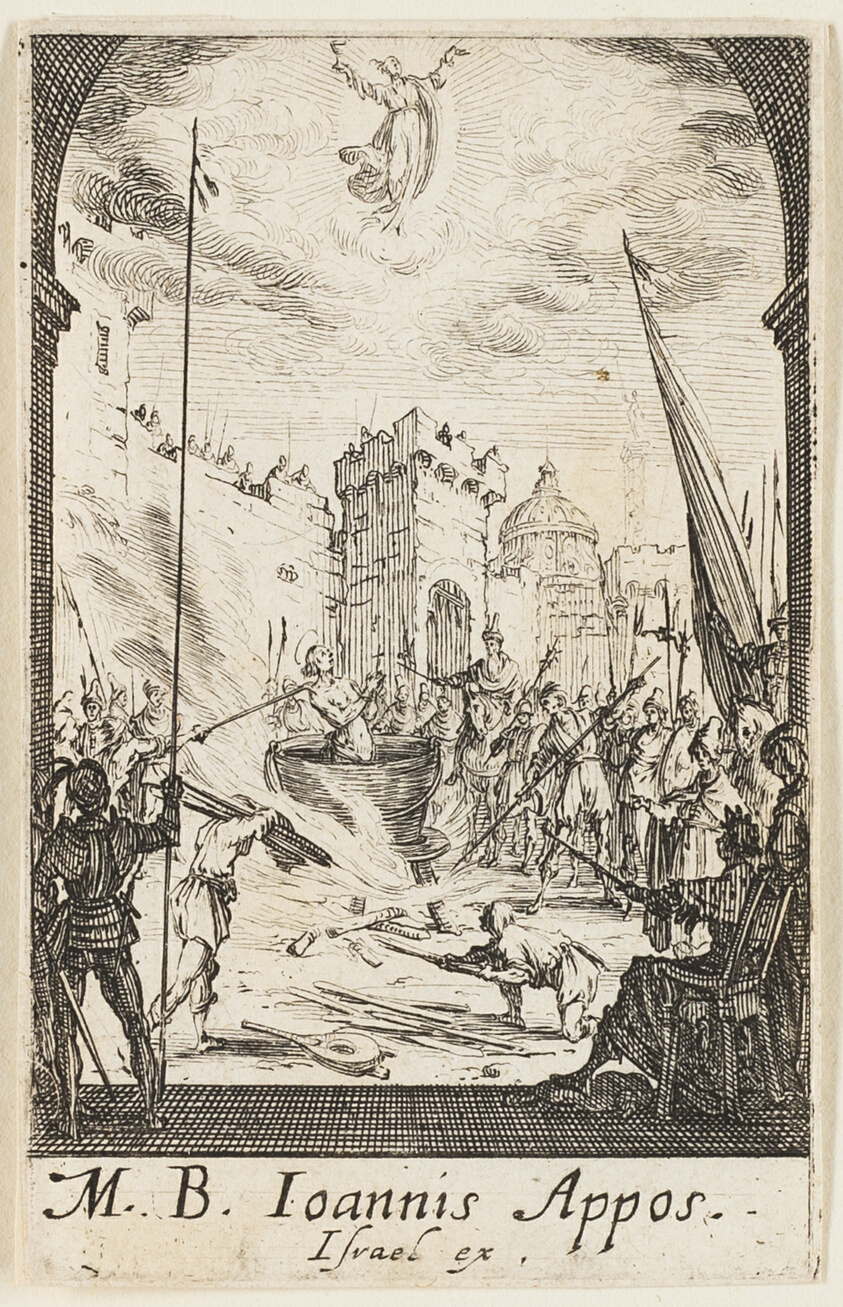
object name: Print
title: The Martyrdom of Saint John the Evangelist, plate five from The Martyrdoms of the Apostles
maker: Jacques Callot (French, 1592-1635)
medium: Etching on paper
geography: France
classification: etching; print; prints and drawing